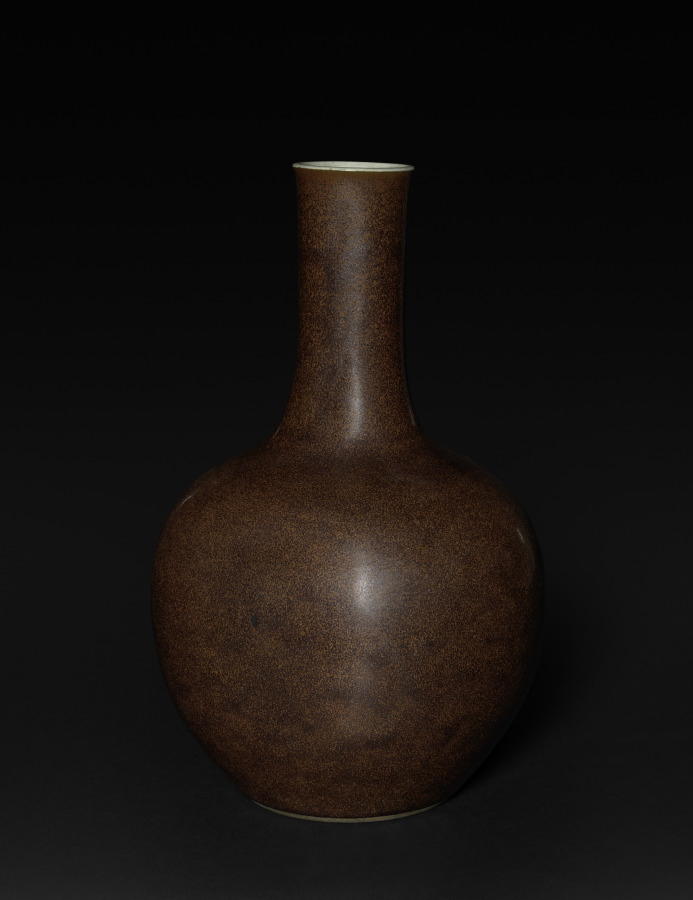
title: Vase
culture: China, Qing dynasty (1644–1911), Qianlong reign (1736–95)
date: 1736–95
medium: porcelain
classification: Ceramic